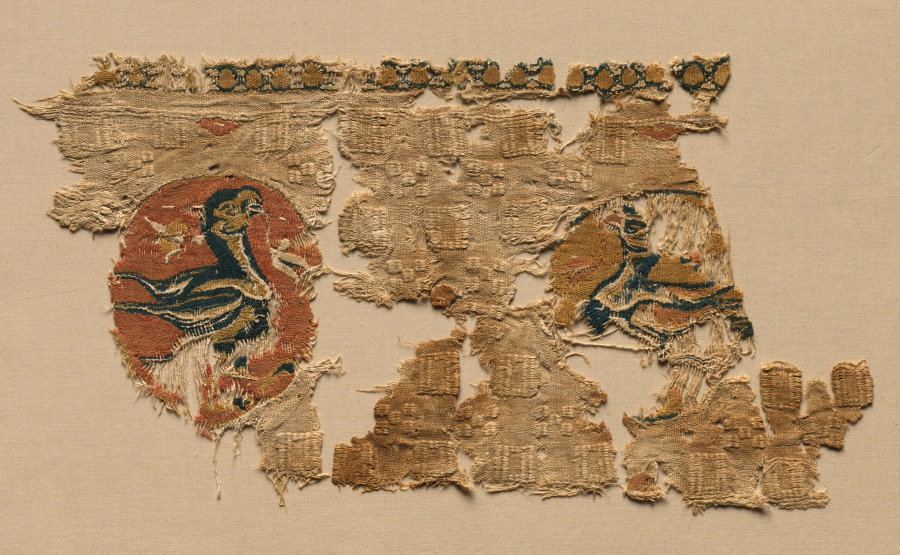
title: Hanging with birds in roundels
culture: Egypt, al-Bahnasa, Tulunid period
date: 800s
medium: plain weave with inwoven tapestry weave and supplementary wefts: linen and wool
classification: Textile